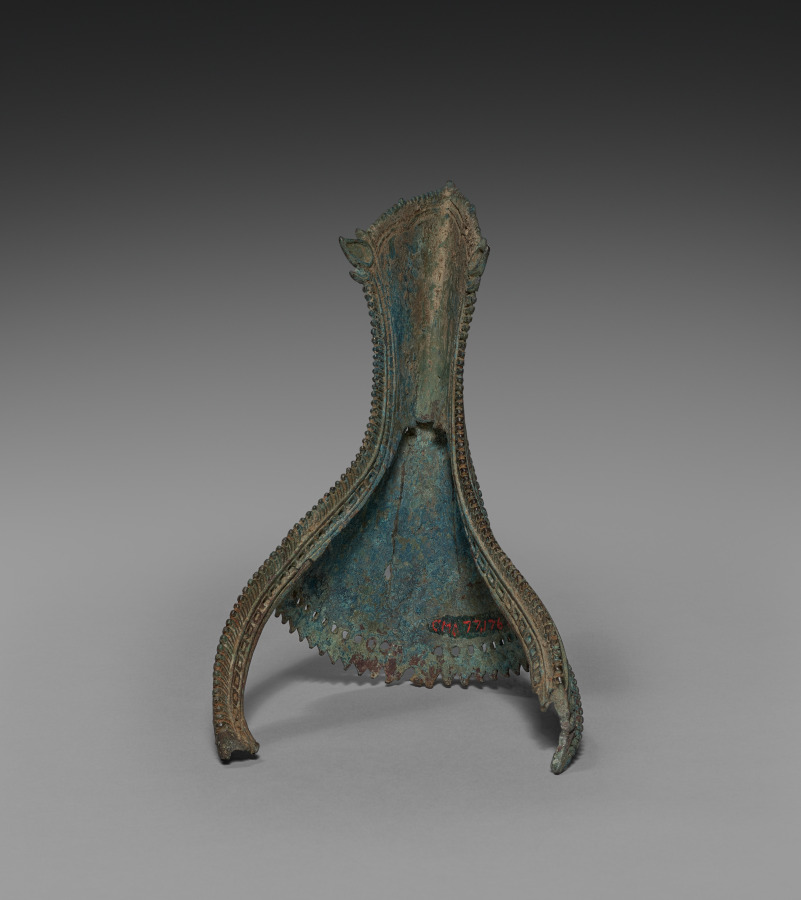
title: Sheath for ritual conch shell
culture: Cambodia, Khmer, Angkor period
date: 1100s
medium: shell and bronze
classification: Sculpture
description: A royal temple like Banteay Chhmar was built for performing rituals and to honor images of gods, Buddhas, and other sacred or enlightened beings for the sake of the kingdom’s protection and ongoing prosperity. Conch shells were blown at the start of rituals to make the sound corresponding to the syllable om. The dancing figure of Hevajra, a Buddhist being of enlightenment with eight heads, sixteen arms, and four legs, has been worked into the bronze embellishment of the shell. Hevajra was elevated to a prominent position in Khmer Buddhism of the Angkorian period as the standard figure denoting the practice of rituals prescribed in a text called the Hevajra-tantra. The tripod stand with three serpents is probably not original to the shell.